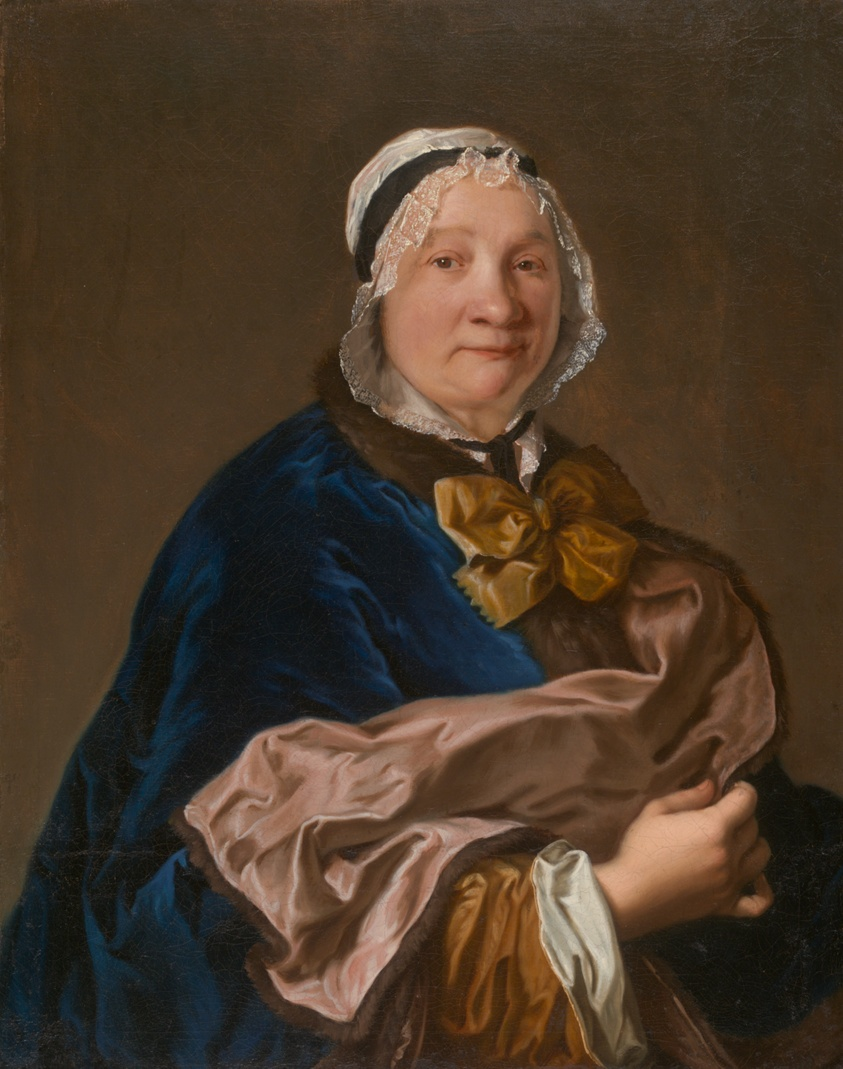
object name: Painting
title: Portrait of a Lady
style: 18th Century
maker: Artist unknown (French or Swiss, active 18th century)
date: 1725/50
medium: Oil on canvas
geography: Switzerland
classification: oil on canvas; french; oil paintings (visual works); paint; portrait; painting; european painting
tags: portraits: female subject, France, French, blue (color), portraits, portrait, woman, headdresses